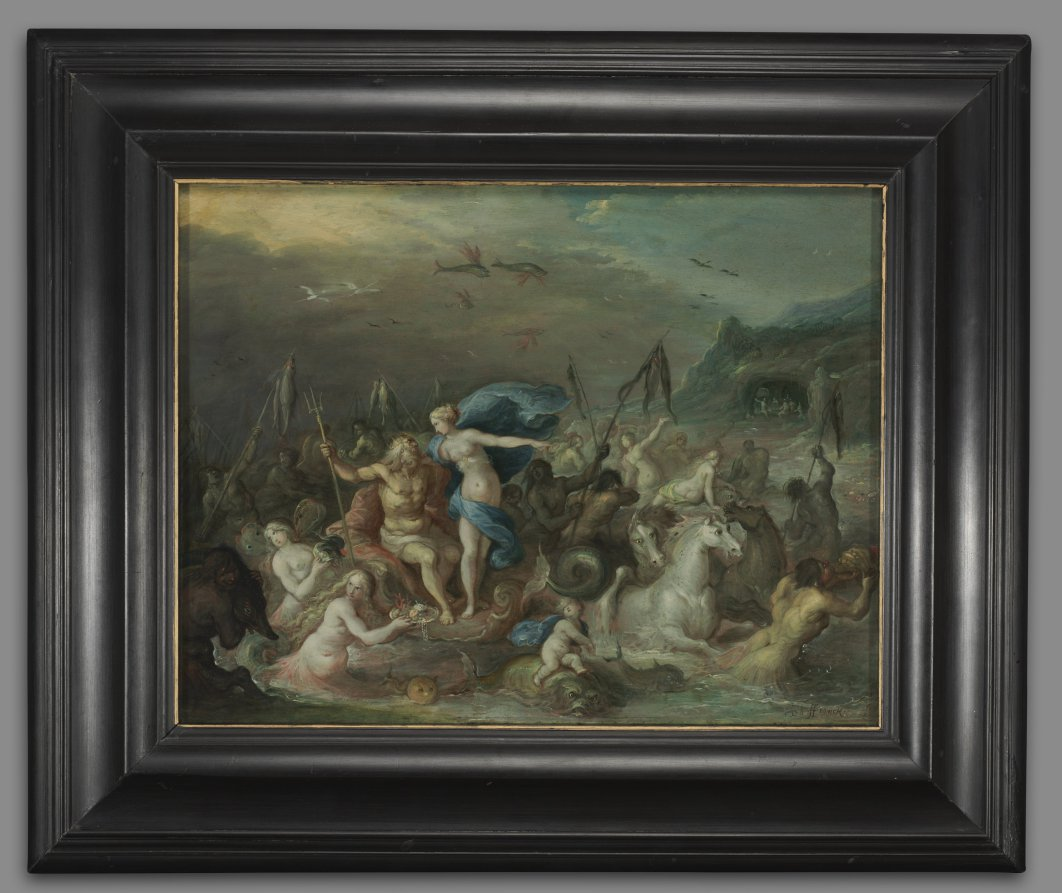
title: The Triumph of Neptune and Amphitrite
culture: Flanders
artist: Frans Francken (Flemish, 1581–1642)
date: 1630s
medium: oil on copper, mounted on wood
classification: Painting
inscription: signed lower right: D.O. ffranck. f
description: Neptune—the Roman god of water—and his wife, Amphitrite, ride a chariot pulled by sea horses. Water fowl and flying fish glide in the sky above them, while in the distance a group of nymphs beckon from a grotto. Neptune’s trident represents his power over water and storms; the fish, shells, coral, and pearls carried by his subjects show his wealth.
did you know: The smooth surface of the copper panel highlights Francken's delicate painting technique.